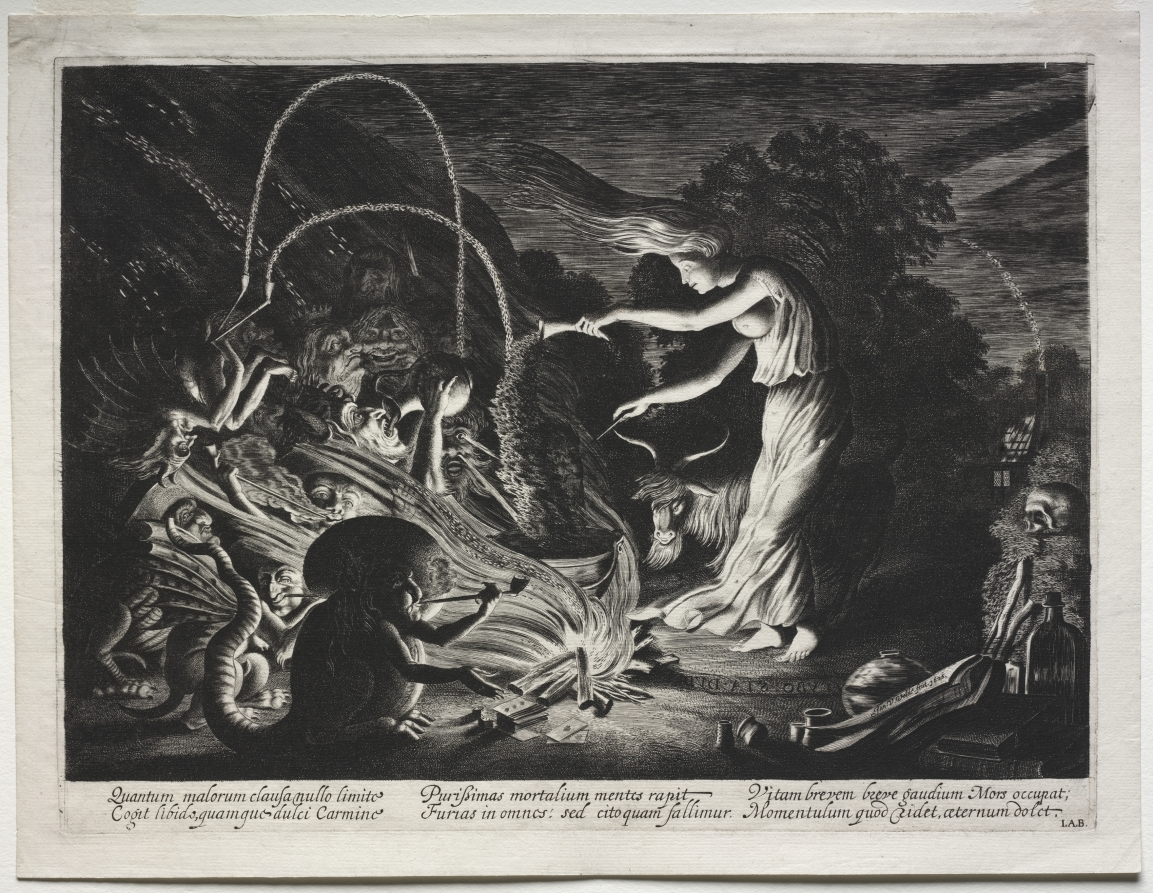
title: The Witch (Night Piece)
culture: Netherlands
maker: Jan van de Velde II (Dutch, c. 1593–1641)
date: 1626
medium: engraving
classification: Print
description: This nocturnal scene depicts a bare-breasted sorceress concocting her evil brew in the company of bizarre beasts. She stands within a "magic circle" scratched into the ground, the supernaturally consecrated space for witchcraft—a likely inspiration for the circular forms of Salvator Rosa's paintings. She overturns a horn into her cauldron engulfed in billowing flames; mixing with the powder are two streams of ash that spew forth from pipes held in the anus of a somersaulting demon at left. The swirling, decorative composition and the variety of grotesque creatures making knowing and silly faces at the viewer add elements of whimsy and farce to the ostensibly serious occult subject.